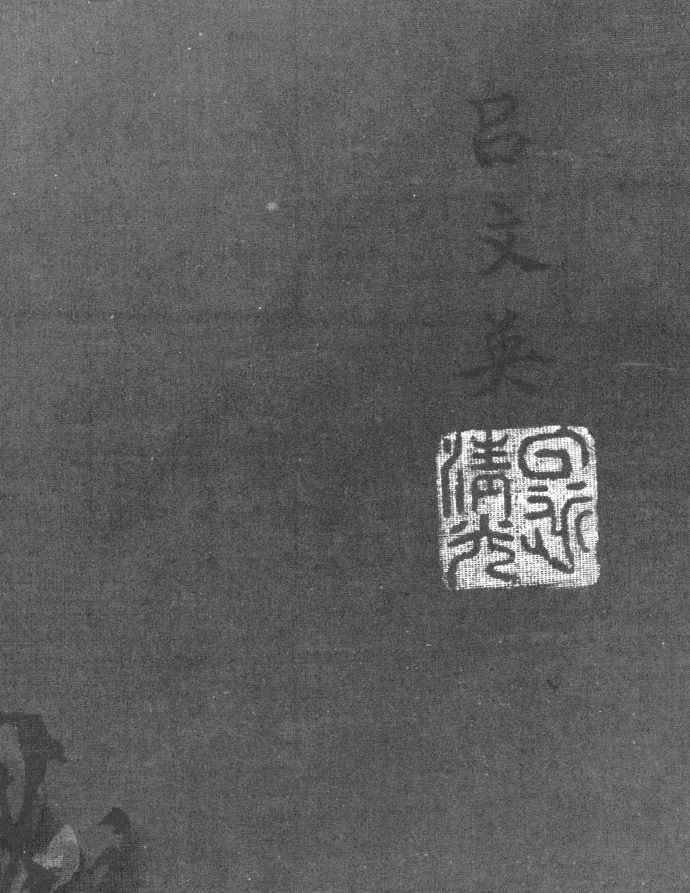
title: River Village in a Rainstorm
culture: China, Ming dynasty (1368–1644)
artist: Lu Wenying (Chinese)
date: c. 1480–1507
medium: Hanging scroll; ink and slight color on silk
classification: Painting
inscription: 呂文英 [印] 日近清光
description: In this scene, windswept rain pelting a village captures the power of nature in a masterful composition. Lü Wenying from Zhejiang served as a court painter during the Hongzhi era (1488–1505). Hardly known, with few remaining works, he is considered a Zhe school painter who followed the style of the Southern Song academy. Zhe school painters, named after the province of Zhejiang, transformed the poetic scenery of the Southern Song artists into dramatic, large-scale views. Active in the same region with frequent monsoon rains in the summer season, artists were familiar with outbreaks of rain and storms.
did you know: A young boy peeks out a window perhaps viewing the two people struggling through the rain.